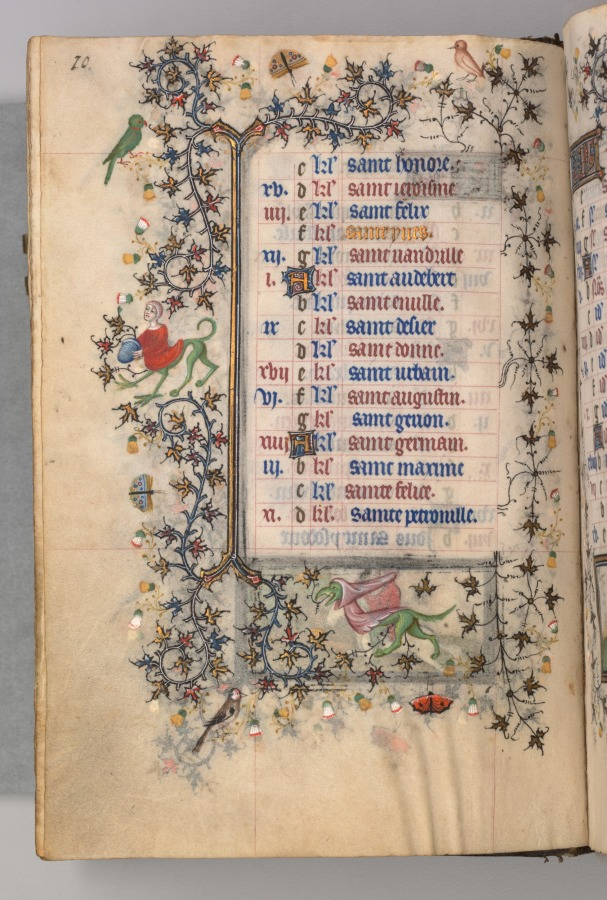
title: Hours of Charles the Noble, King of Navarre (1361-1425): fol. 5v, May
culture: France, Paris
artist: Master of the Brussels Initials and Associates (French)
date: c. 1405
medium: ink, tempera, and gold on vellum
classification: Bound Volume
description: This precious volume was obviously highly prized by its owner, the French-born King of Navarre, who had his coat of arms painted on no less than twenty folios. Rather than directly commissioning this manuscript from a specific workshop, it seems that Charles the Noble acquired his book of hours -- perhaps ready-made for the luxury market -- while on a trip to Paris in 1404-05. A collaborative effort, six painting styles are evidenced within the pages of this codex, those of two Italians, two Frenchmen, and two Netherlanders. The painter who was responsible for the planning and decoration of the book, and who produced seventeen of the large miniatures, was a Bolognese artist known as the Master of the Brussels Initials. His principal assistant, responsible for most of the borders, was a Florentine who signed his name "Zecho" da Firenze on folio 208 verso.